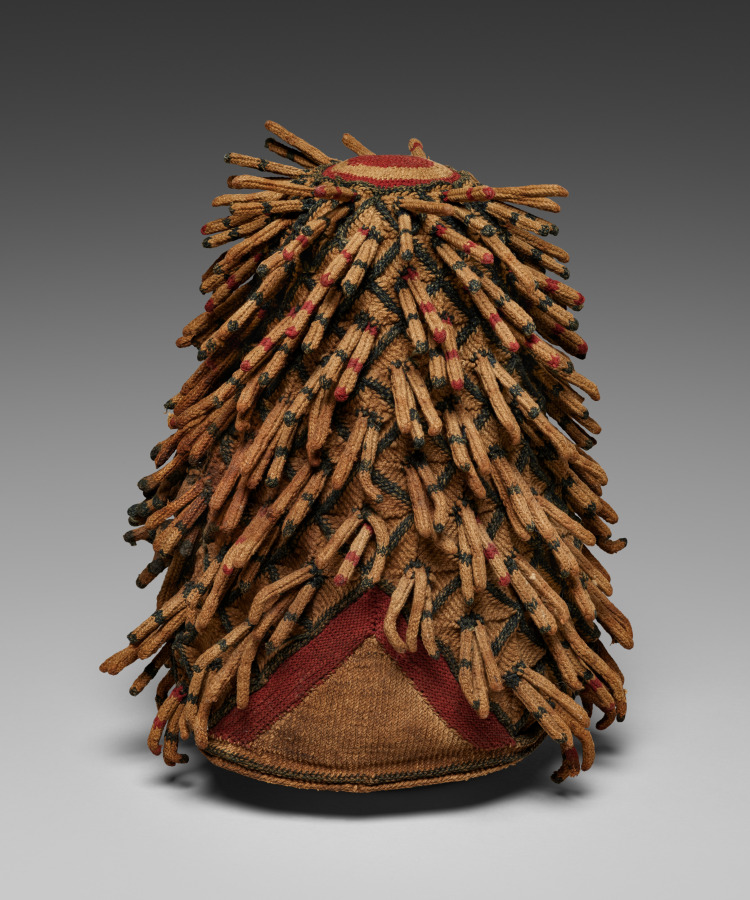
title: Prestige Headdress (Ashetu or shüötu)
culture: Bamum style, unknown maker, Grassfields region, Cameroon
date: 1900–1950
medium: cotton, dye (including indigo)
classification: Textile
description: The bristle-like surface of this man’s prestige headdress is dyed with indigo or a red pigment. Below, a diamond pattern evokes another royal symbol, the leopard. The projections are reinforced with small pieces of wood. Such extensions are seen on prestige headgear represented in wood in sculptures and in colored pencil on drawings in the collection.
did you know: Titled men still wear such prestigious adornment today.